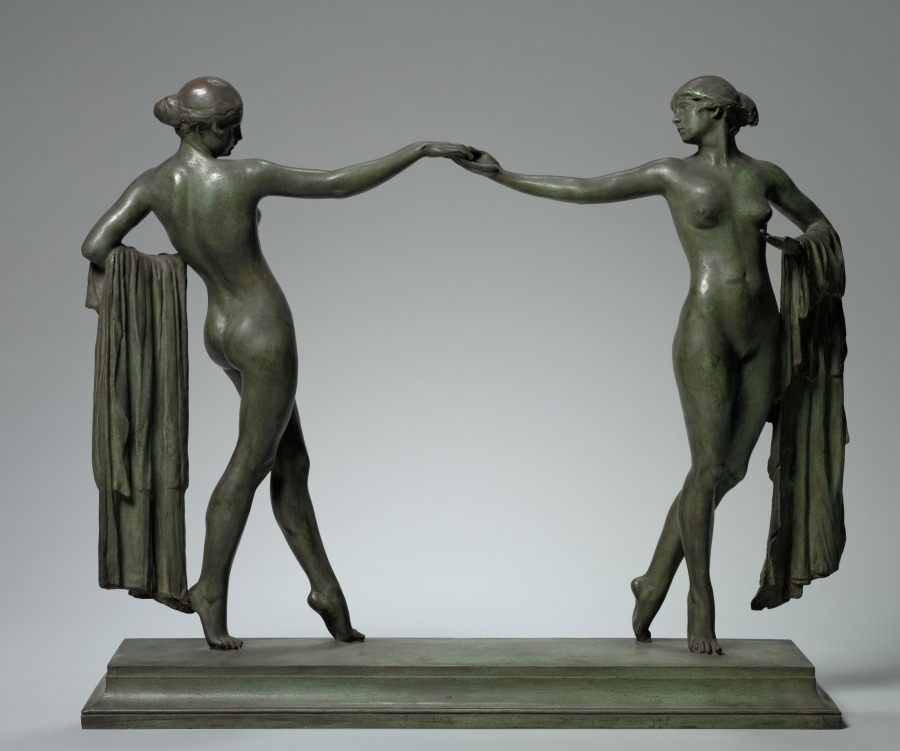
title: Andante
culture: America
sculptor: Mario Korbel (American, born Bohemia [now Czech Republic], 1882–1954)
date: 1917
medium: bronze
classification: Sculpture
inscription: signed on base: MARIO KORBEL 1917 ©